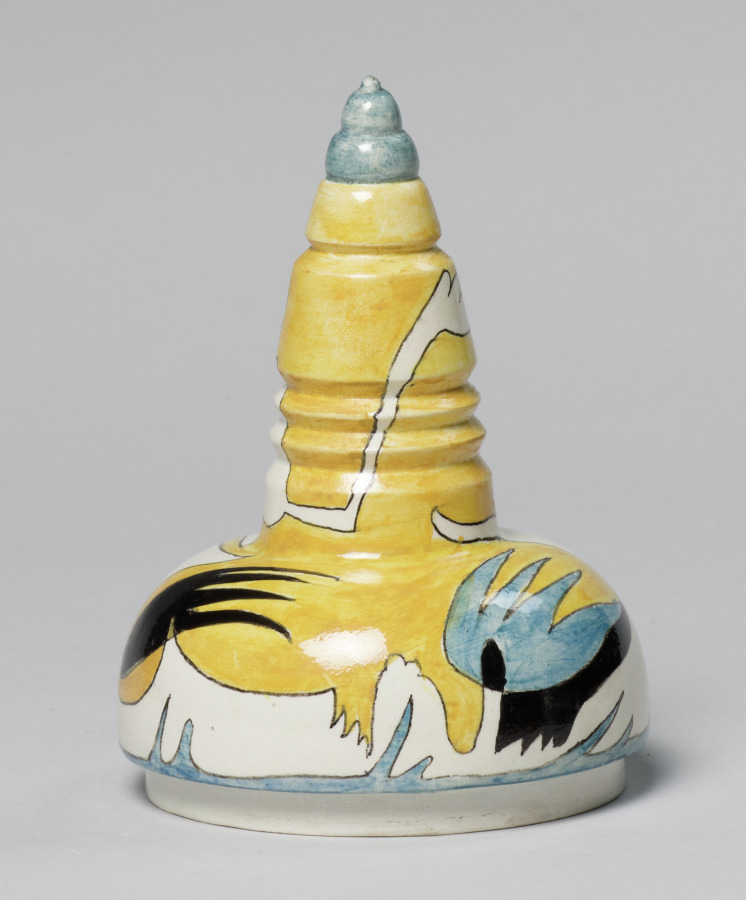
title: Lid for a Jar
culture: Netherlands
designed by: Theodorus A. C. Colenbrander (Dutch, 1841–1930)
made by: Rozenburg Factory (Netherlandish)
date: 1885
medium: earthenware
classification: Ceramic